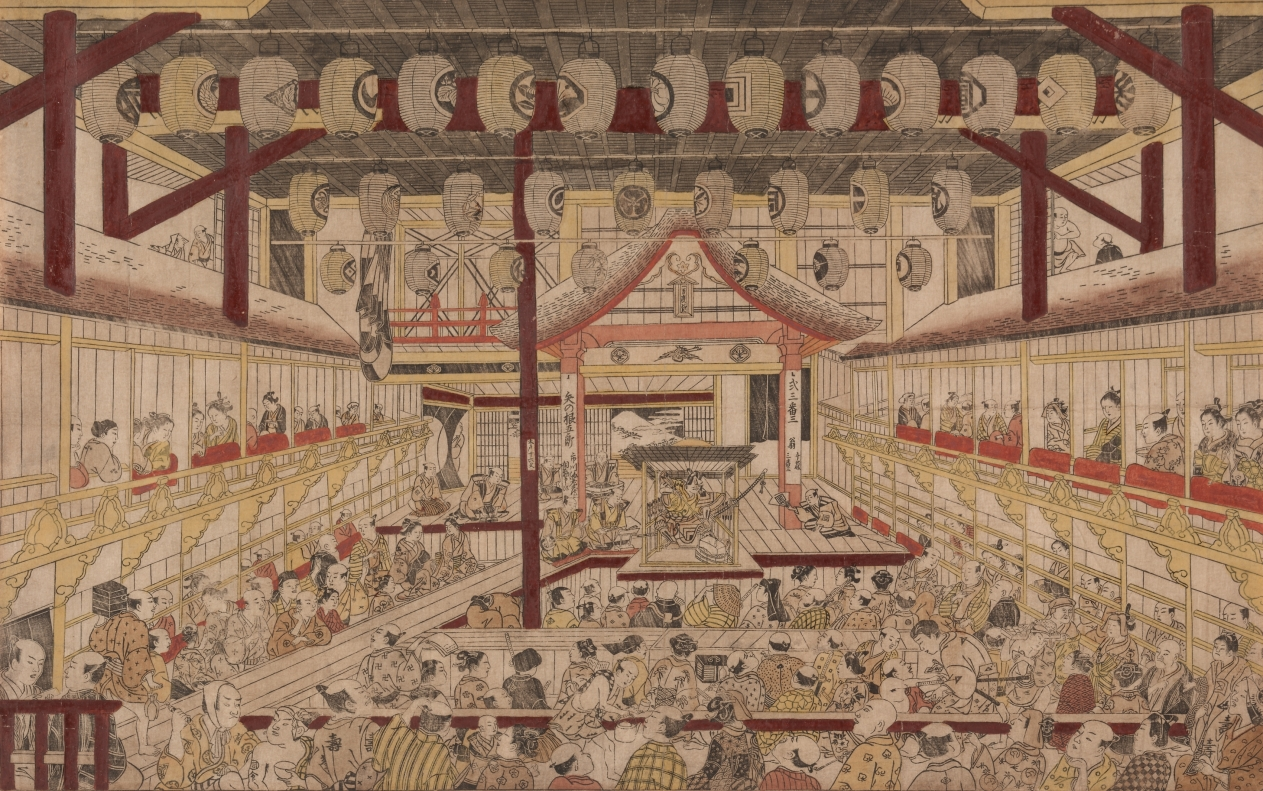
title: Perspective View of the Interior of the Nakamura Theater with Ichikawa Ebizo II as Yanone Goro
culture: Japan, Edo period (1615–1868)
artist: Okumura Masanobu (Japanese, 1686–1764)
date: 1740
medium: hand-colored woodblock print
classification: Print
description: The print illustrates the typical interior of a Kabuki theater. The stage was connected to the audience by the hanamichi, the ramp or runway extending from the stage to the rear of the theater over which the actors would strut in dramatic roles. Patrons often stayed all day for the plays. Unlike quiet Western audiences, Kabuki fans were spirited, buying food from vendors and even shouting praises to their favorite actors as they came onto the stage. In 1734, the first Japanese manual on perspective was printed. Masanobu was probably the first printmaker to use this method of describing three-dimensional space on a two-dimensional support. He helped popularize the perspective print, and he introduced other innovations such as two-color printing and hand-coloring—this print is hand-colored using yellow, red (tan), and red-brown.